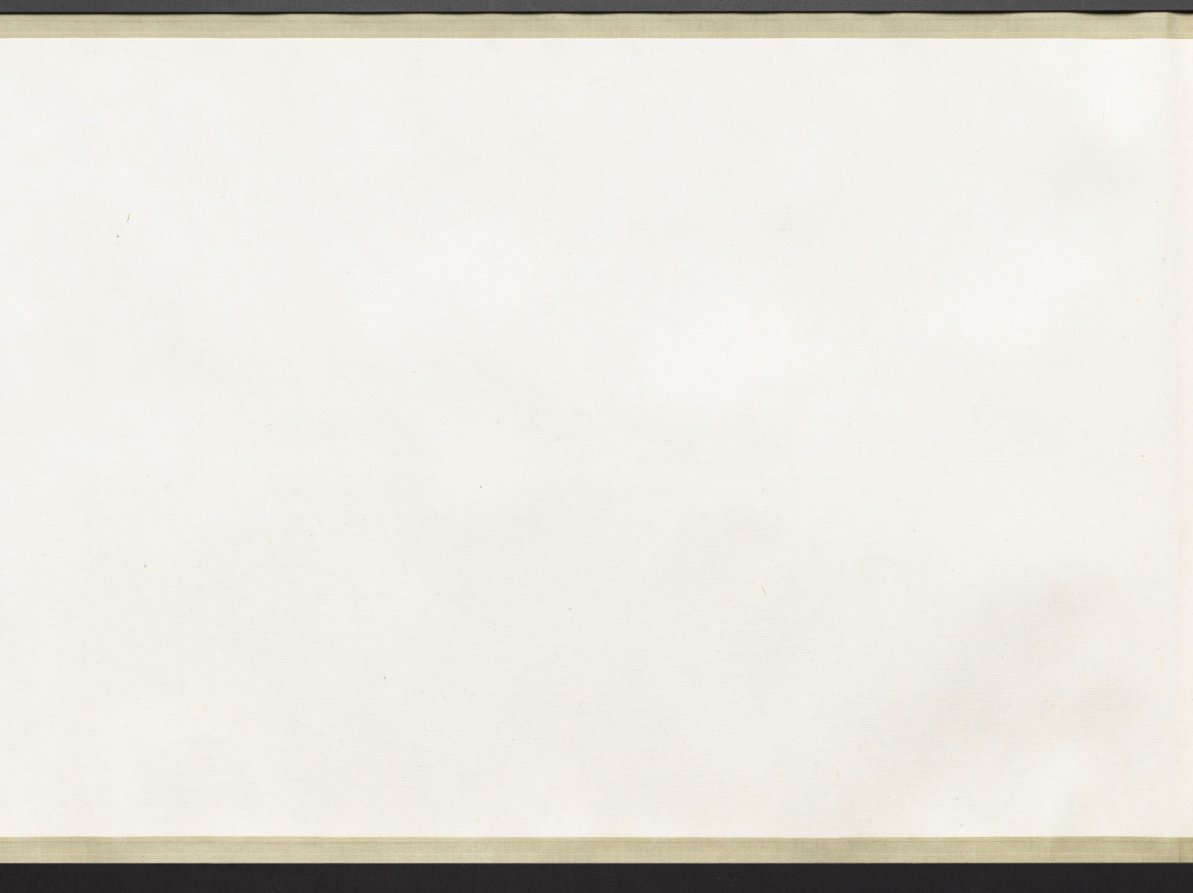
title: A Hundred Sparrows in a Lofty Grove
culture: China, Ming dynasty (1368–1644)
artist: attributed to Lin Liang (Chinese, 1416–1480)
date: 1368–1644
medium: handscroll; ink on silk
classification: Painting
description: Sparrows engaged in all kinds of activities frolic amid leafy branches, blades of grass, rocks, and a waterfall. As our eyes move over the scroll, the artist engages us in enjoying the sparrows’ carefree movements in a natural setting. The charming birds were painted from close observation in swift and fluent brushstrokes. Sparrows are a common bird and in Chinese painting they often represent the commoner in human society as opposed to the noble pheasant or peacock representative of the ruling class.